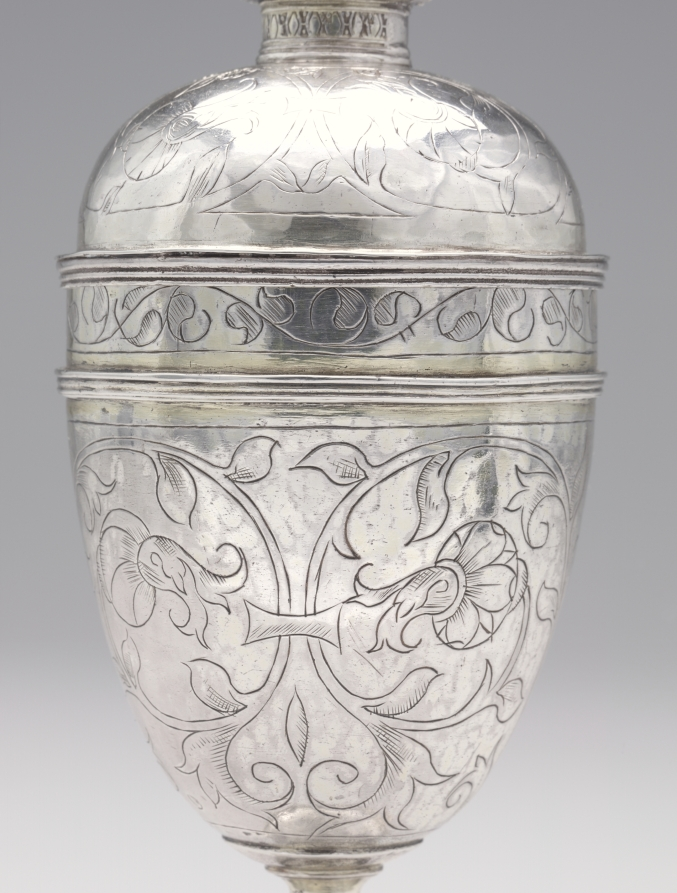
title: Standing Cup and Cover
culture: London, England, late 16th century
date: 1593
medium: silver, partially gilt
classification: Silver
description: Produced during the last years of the Tudor dynasty (1485–1603), this vessel exemplifies the symmetrical patterns, horizontal designs, and clear division of space typical of English silverwork at the time. The functional shape and ornamental designs characteristic of standing cups made them ideal for ceremonial occasions.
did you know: Often made for members of guilds and trade associations in London, standing cups were frequently used during toasts.